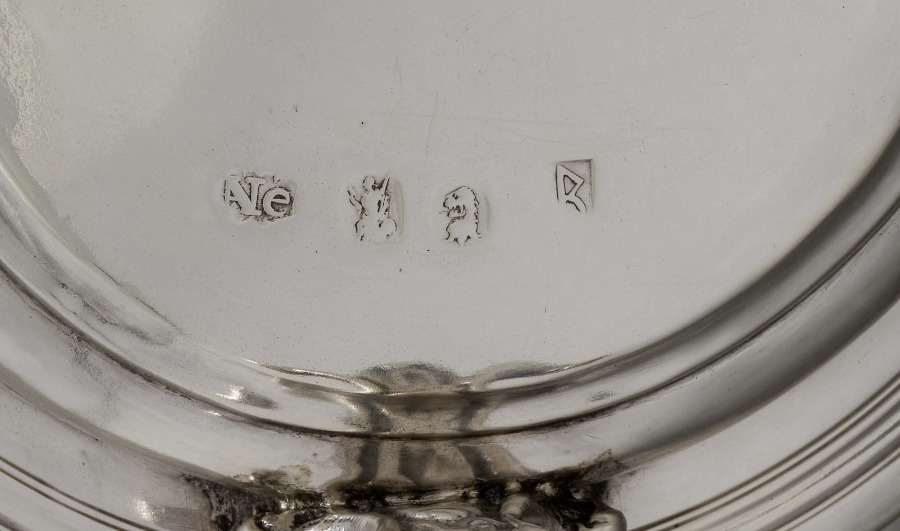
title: Tankard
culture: England, London, 18th century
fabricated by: Anthony Nelme (British)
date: 1703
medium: silver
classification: Silver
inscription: engraved beneath base: "H/RM." Engraved opposite handle crest with head of a blackamore; identified in Fairbairn as DEN family crest.